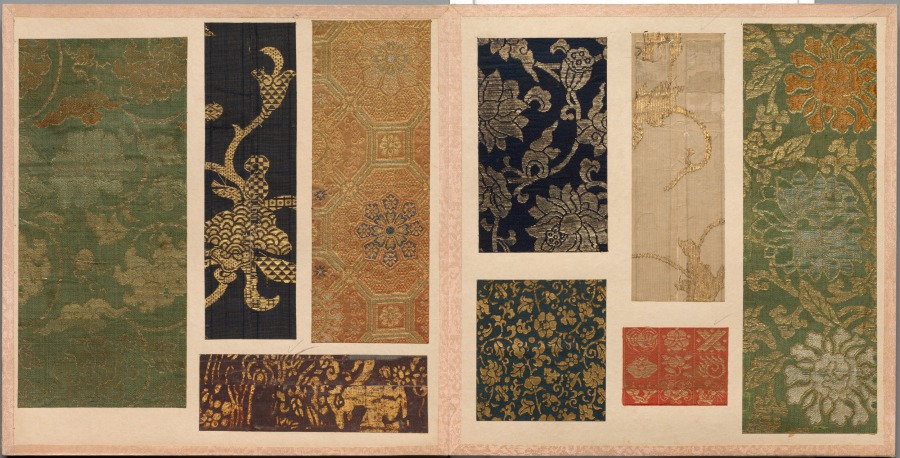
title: Album of Textile Samples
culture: Japan and China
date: 1700s–1800s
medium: silk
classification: Textile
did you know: This album has 26 pages containing 128 mounted Chinese or Japanese textile samples.